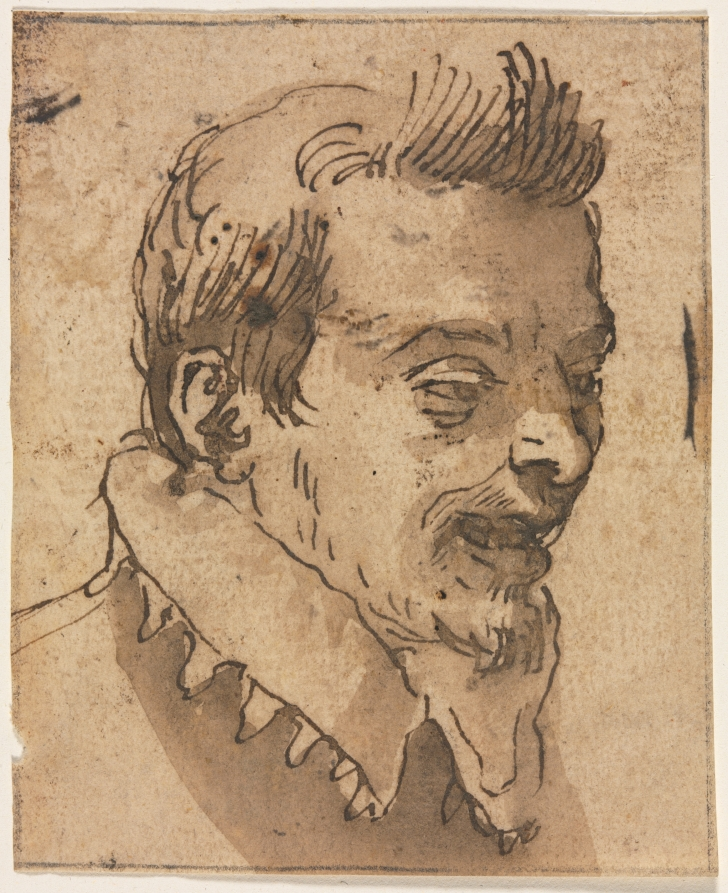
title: Head of a Man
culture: Italy, 16th century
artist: circle of Annibale Carracci (Italian, c. 1560–1609)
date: 1500s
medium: pen and brown ink (iron gall?) and brush and brown wash; framing lines in graphite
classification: Drawing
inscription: VERSO, lower left, in brown ink: M. daCaravaggio ; lower left, in brown ink: N.° 118.